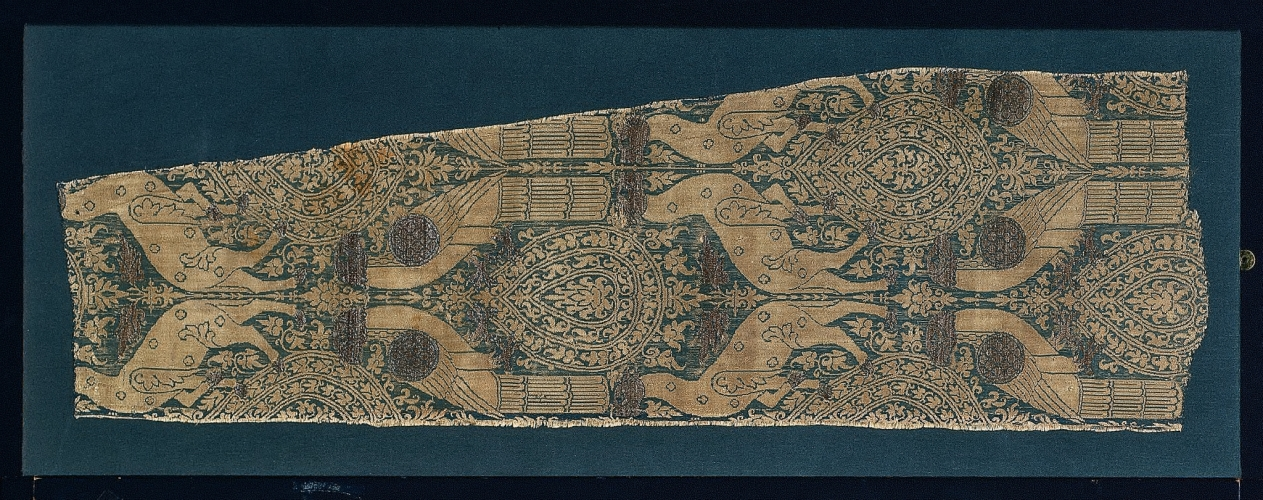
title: Parrots and Animals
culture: Italy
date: 1300s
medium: silk, gold thread; a combination of two weaves (lampas)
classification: Textile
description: Silk weaving became an important industry in Italy during the 13th century, especially in Lucca and Venice. Initially, it was closely associated with silk patterns that were woven in the well established textile industry in Islamic Spain. Here, the Islamic influence is apparent in the paired eagles and gazelles flanking concentric bulb-shaped palmettes. Many variations of this design were woven in Italy during the 1300s. Examples that belonged to a pope, cardinal, and bishop provide dates between 1334 and 1361 based on their obituaries. Inventories in the Vatican also describe vestments displaying animals and birds with gold heads throughout the1300s. Here, costly gold thread was only interlaced where it is visible in the pattern.